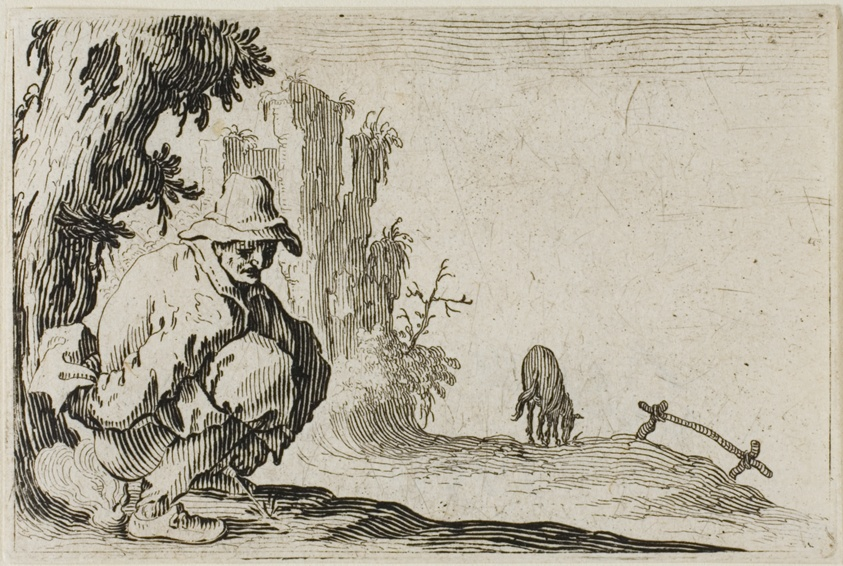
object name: Print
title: The Peasant Squatting, from The Caprices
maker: Jacques Callot (French, 1592-1635)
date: c. 1622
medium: Etching on ivory laid paper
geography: France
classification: etching; print; prints and drawing